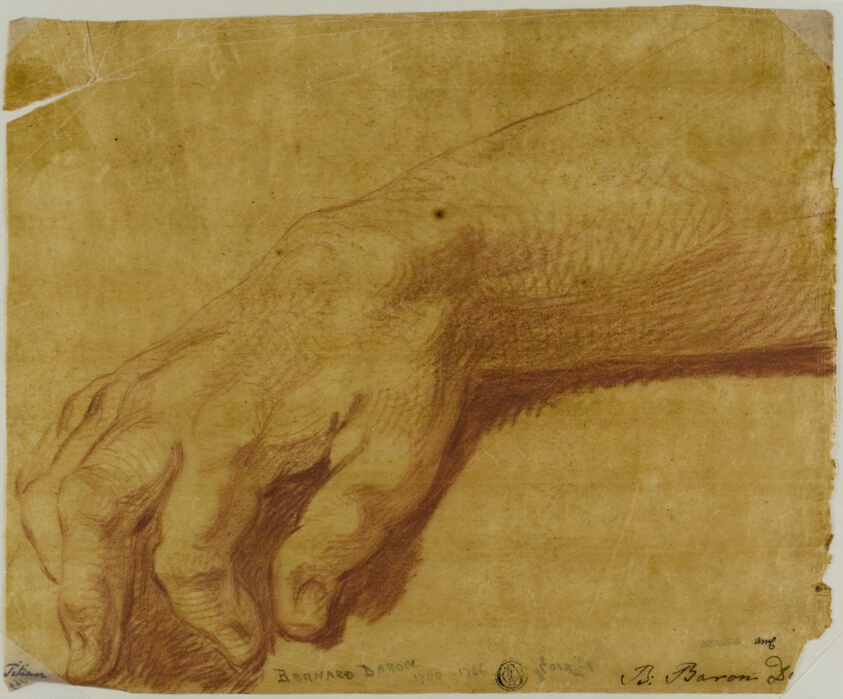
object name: Drawing and Watercolor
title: Right Hand of Jupiter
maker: Bernard Baron (French, 1696-c. 1766); after Tiziano Vecellio, called Titian (Italian, c. 1488-1576)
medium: Red chalk on oiled golden-yellow transparentized laid paper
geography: France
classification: chalk; drawings (visual works); prints and drawing